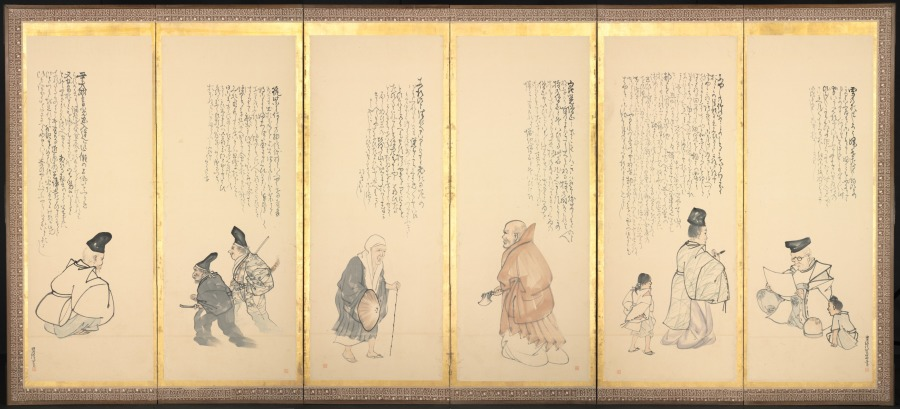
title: Scenes from Essays in Idleness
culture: Japan, Edo period (1615–1868)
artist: Matsumura Goshun (Japanese, 1752–1811)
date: late 1700s–early 1800s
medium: Pair of six-panel folding screens; ink and color on paper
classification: Painting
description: Matsumura Goshun inscribed passages from Buddhist monk Yoshida Kenkō’s (1283–1350) well-known collection of anecdotes, Essays in Idleness, across the top of each of the twelve panels of this pair of screens. Goshun illustrated the episodes with his vision of the figures who feature in them. The texts cascade down from right to left, forming unique compositional relationships with the images below.